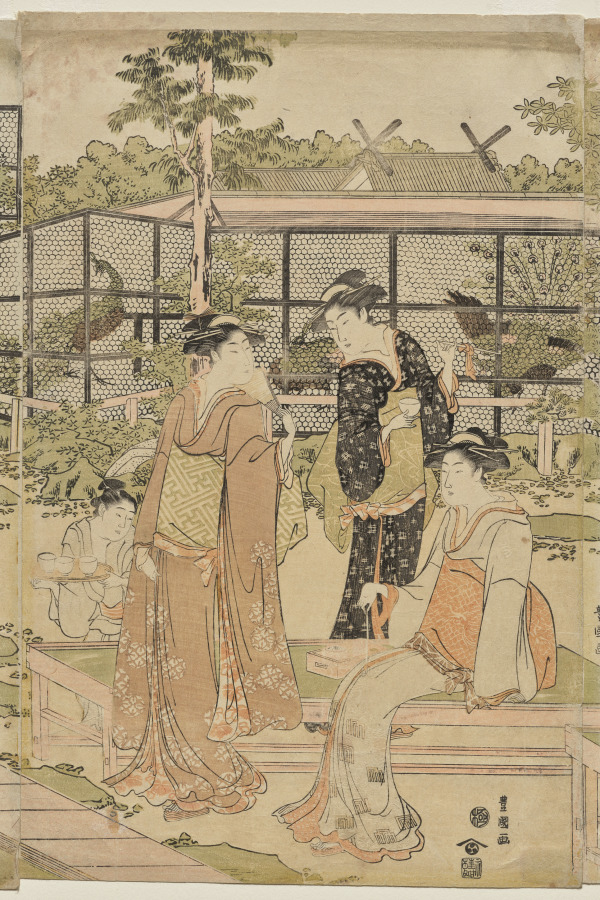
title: The Shika Teahouse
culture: Japan, Edo period (1615–1868)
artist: Utagawa Toyokuni (Japanese, 1769–1825)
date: early 1790s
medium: One of a triptych of color woodblock prints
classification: Print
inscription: Signature: Toyokuni ga Publisher: Nishimuraya Yohachi (Eiju han, emblem) Censorship Seal: kiwame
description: Exotic birds and tobacco—Western imports—feature in this composition. Peacocks and parrots were brought to Japan by Dutch traders in the 1700s. Many of the visitors to this teahouse, which specialized in displays of foreign birds, admire the unusual fowl while sipping tea and smoking long pipes. The birds have attracted curious courtesans, entertainers, samurai, merchants and their wives, and even a Buddhist monk.